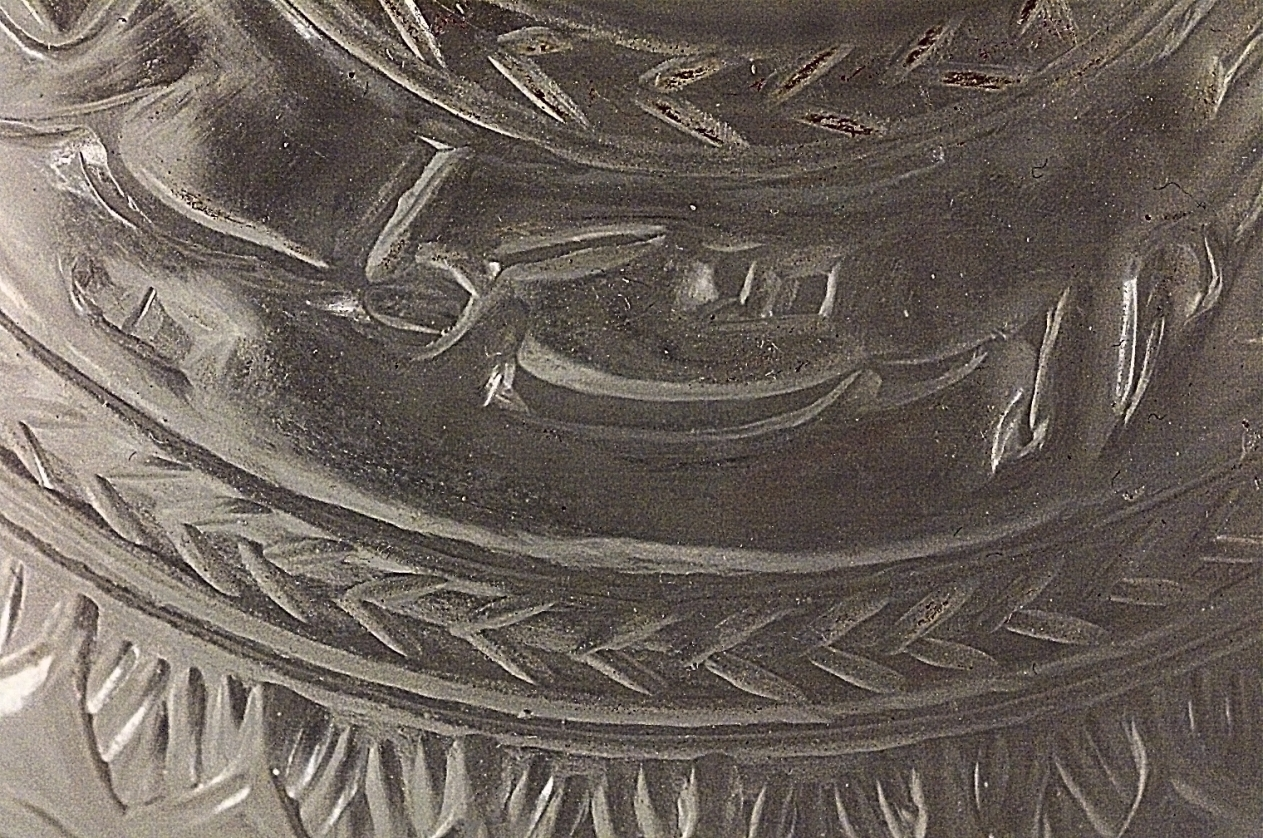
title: Hookah Bowl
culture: India, Mughal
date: 1700s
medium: glass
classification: Glass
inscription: Inscription in Farsi, on body: Even if live charcoal is placed on its head/ The hookah, a teacher of etiquette,/ will not respond unless drawn upon;/ Thus one can learn from its manners of refinement.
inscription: Inscription in Farsi, on shoulder: In the name of Allah the clement and merciful is the key to the wise treasure.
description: The inscription around the body of the base speaks to the use of the hookah in the decadent life of the Mughal court. The hookah is commended for being a proper, refined servant who will not “respond unless drawn upon” or, produce water bubbles when smoke is drawn through the hose. Undoubtedly the witty, poetic allusions would have been appreciated at banquets and other courtly gatherings. The use of wheel-cut glass for this hookah base may have been influenced by English glass and lead crystal that was exported to India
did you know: Around the top of this hookah bowl are incised the opening two lines from the Khamsa (Quintet) of the celebrated Persian poet Nizami (1141–1209).